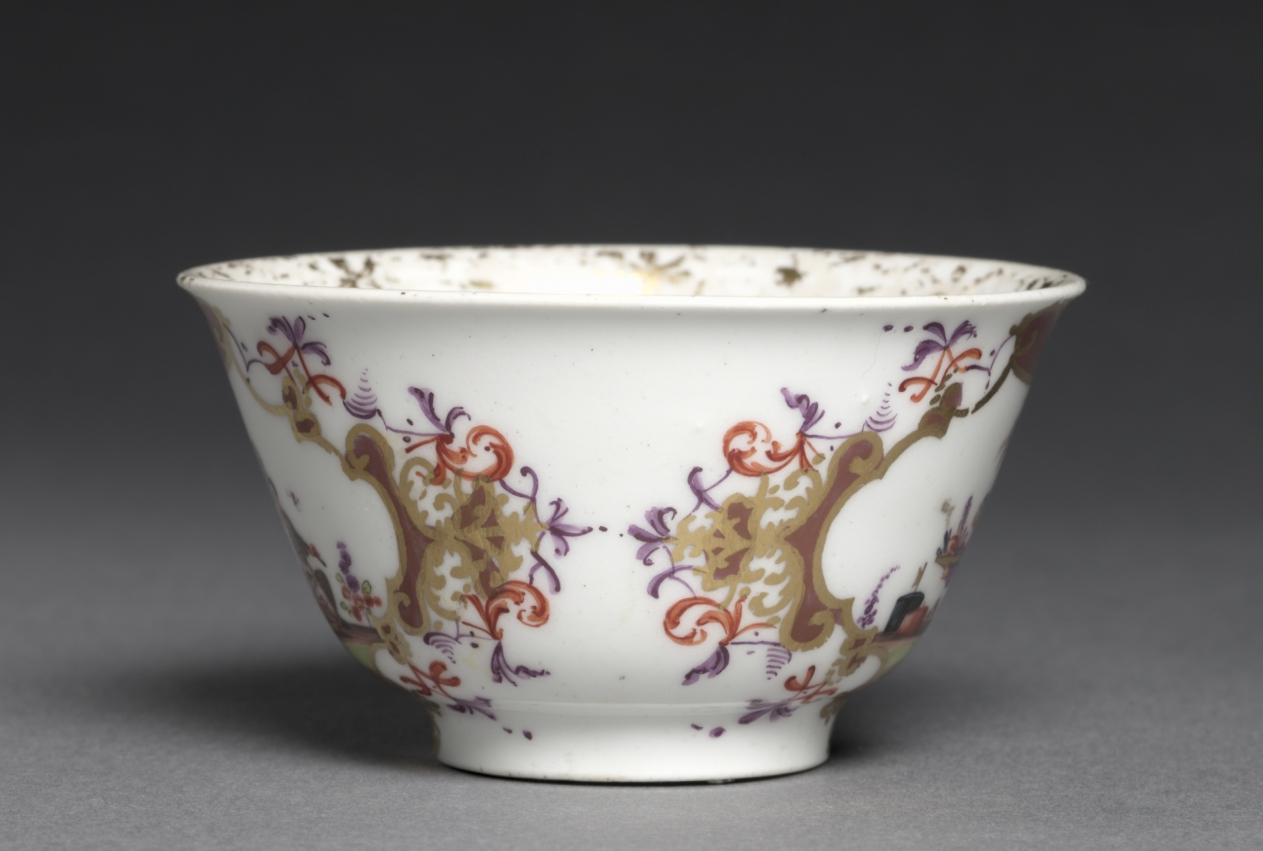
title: Cup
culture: Germany, Meissen, 18th century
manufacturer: Meissen Porcelain Factory (German, est. c. 1710)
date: c. 1725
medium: porcelain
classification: Ceramic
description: About 1725, Herold introduced a new variant of his "chinoiserie" decoration, in which small, full-length figures were depicted against cloudless skies, represented by the now brilliantly white porcelain, within foliate borders of gilt and enamel. This configuration became the standard formula for Meissen figural decoration for the next twenty years, although European subjects came to be depicted with greater frequency toward the middle of the century.